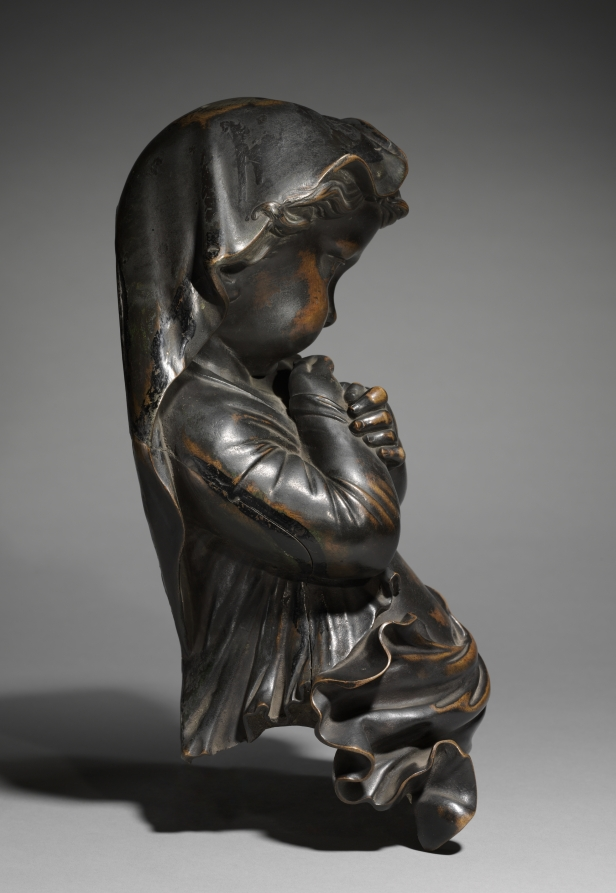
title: Winter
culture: France, 19th century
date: 1800s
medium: bronze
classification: Sculpture